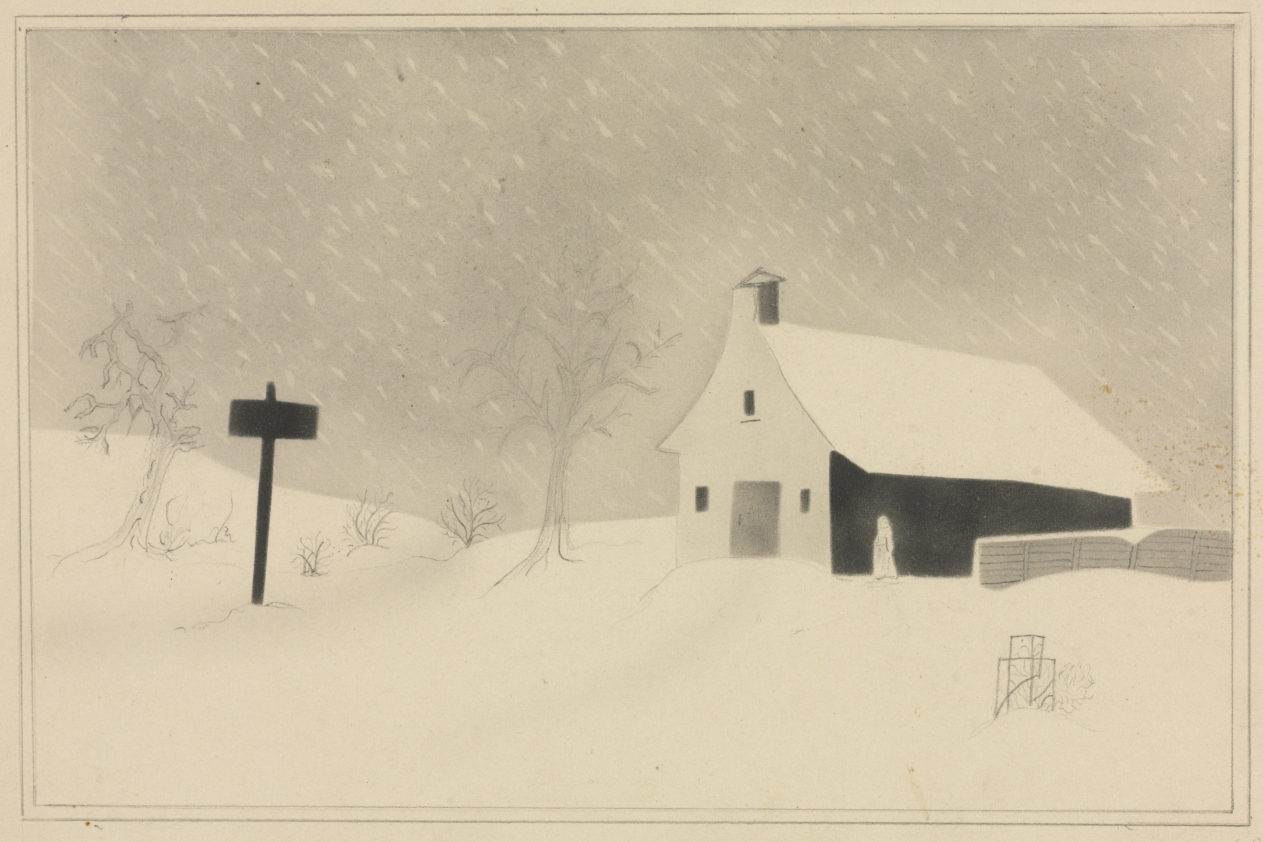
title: Snow Storm in Vermont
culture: America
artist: Mary Altha Nims (American, 1817–1907)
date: 1800s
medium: pencil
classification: Drawing